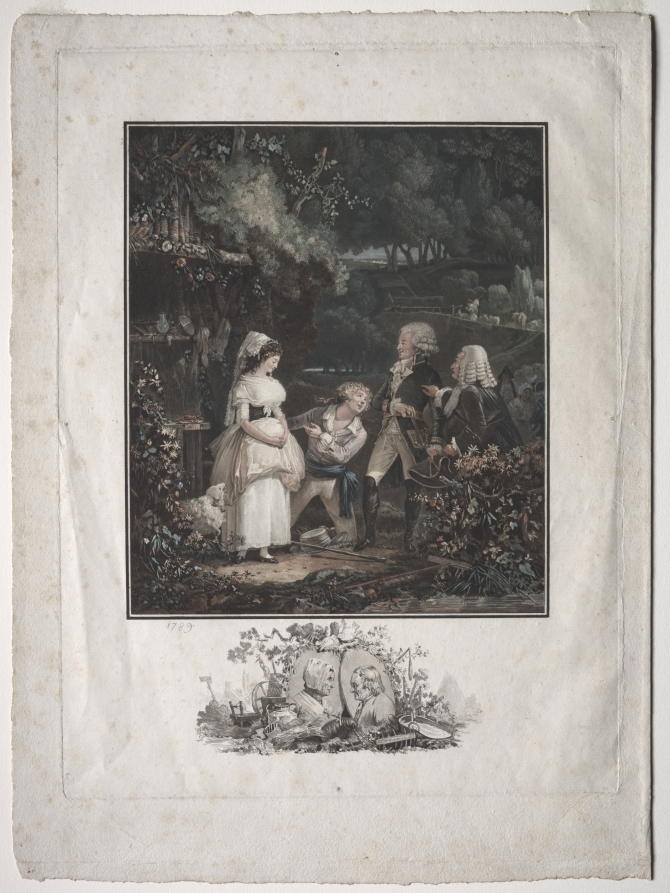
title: Annette and Lubin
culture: France, 18-19th Century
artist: Philibert Louis Debucourt (French, 1755–1832)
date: 1789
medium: color engraving and etching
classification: Print